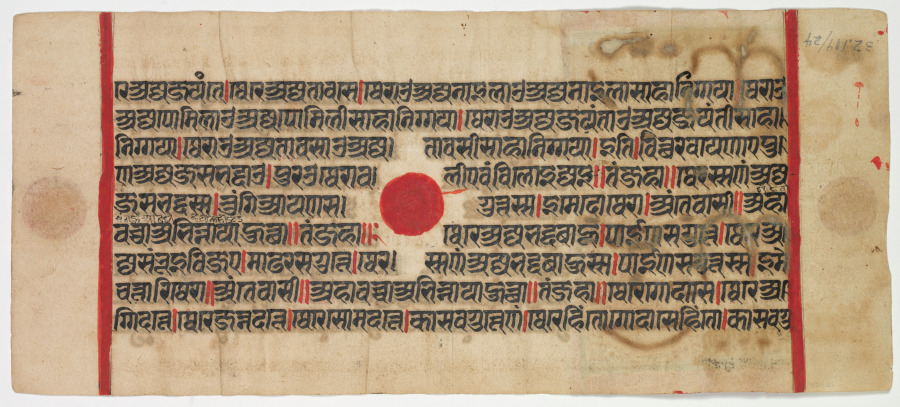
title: Text, folio 60 (recto), from a Kalpa-sutra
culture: Western India, Gujarat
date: c. 1450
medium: Gum tempera, ink, and gold on paper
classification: Painting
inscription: [[beginning with line 1]] [the]re ajja-Jayaṁte | there ajja-Tāvase | therāo ajja-Nāïlāo Ajjanāilā sāhā niggayā | therāo [line 2] ajja-Pomilāo Ajjapomilī sāhā niggayā | therāo ajja-Jayaṁtāo Ajjajayaṁtī sāhā| [line 3] niggayā | therāo ajja-Tāvasāo Ajja|tāvasī sāhā niggayā | iti | vitthara-vāyaṇāe pu| [line 4] ṇa ajja-Jasabhaddāo | purao therāva|lī evaṁ viloijjaï || taṁ jahā || therassa ṇaṁ ajja- [line 5] Jasabhaddassa | tuṁgiāyaṇa-sa|guttassa | ime do therā | aṁtevāsī || ahā- [line 6] vaccā abhinnāyā hutthā ||: there ajja-Bhaddabāhū | pāīṇa-sagutte | there a| [line 7] jja-Saṁbhūivijae | māḍhara-sagutte | thera|ssa ṇaṁ ajja-Bhaddabāhussa | pāīṇa-saguttassa | ime [line 8] cattāri therā || aṁtevāsī || ahāvaccā abhinnāyā hutthā || taṁ jahā || there Godāse | there A| [line 9] ggidatte | there Jannadatte | there Somadatte | kāsava-gutte ṇaṁ | therehiṁto Godāsehiṁto | kāsava-gu-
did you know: The three red dots in the margins and the center occur only on the reverse side of the page; the obverse side has only one red dot in the center.